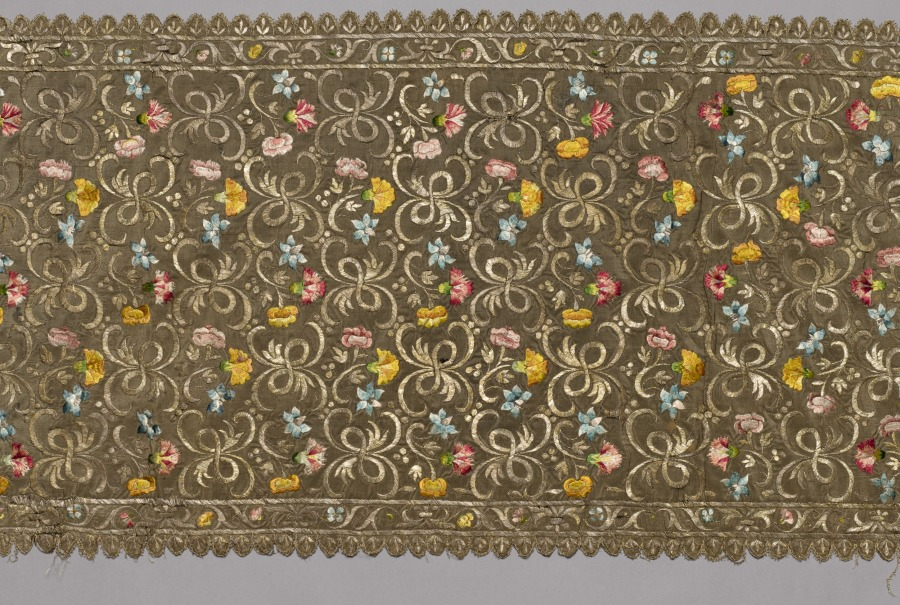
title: Panel, Probably from a Christening Mantle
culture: Italy, late 16th century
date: late 1500s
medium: Silk, gold thread; embroidery: couching, stem, long, and short stitches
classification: Embroidery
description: This panel is likely from a christening mantle, a decorative shawl or cape worn during the procession at a christening. This example features radiant gold thread enhanced with eight vibrant colors of shiny silk thread that create a delicate pattern of blossoms issuing from ornate stems. The decoration forms the main field and two end sections bordered by foliate motifs.